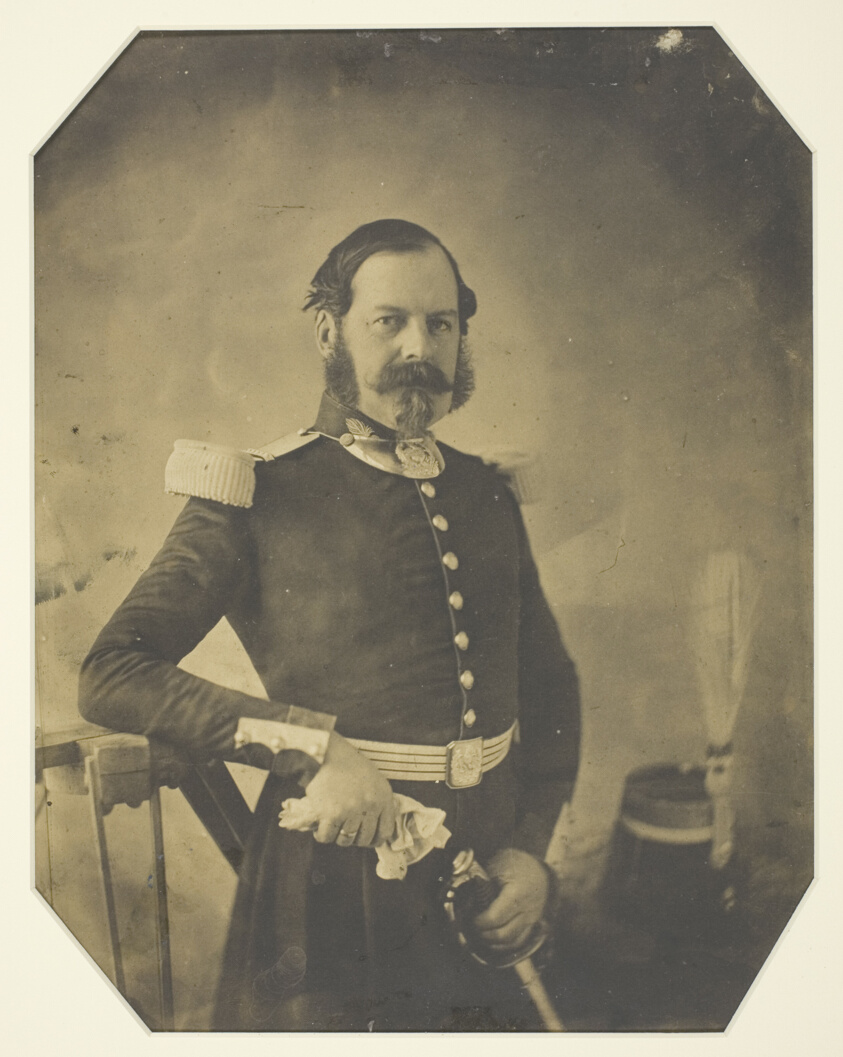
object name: Photograph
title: Portrait of a French Military Officer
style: 19th century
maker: Artist unknown; French, mid-19th century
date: c. 1855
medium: Salted paper print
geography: France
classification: photograph; photography